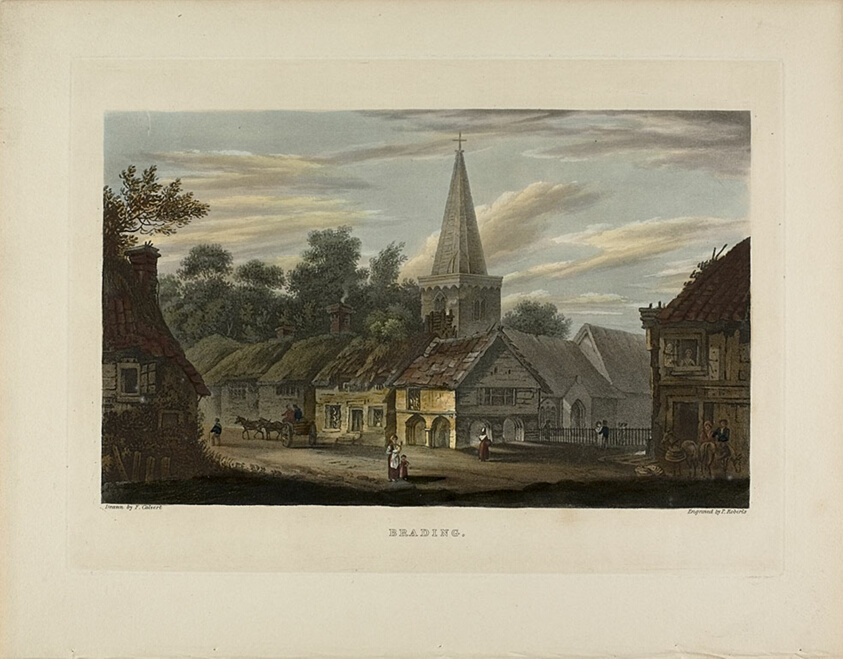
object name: Print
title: Brading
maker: P. Roberts (English, 19th century); after Raisey Calvert (English, b. 1794)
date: c. 1794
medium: Color aquatint on paper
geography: England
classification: aquatint; print; prints and drawing